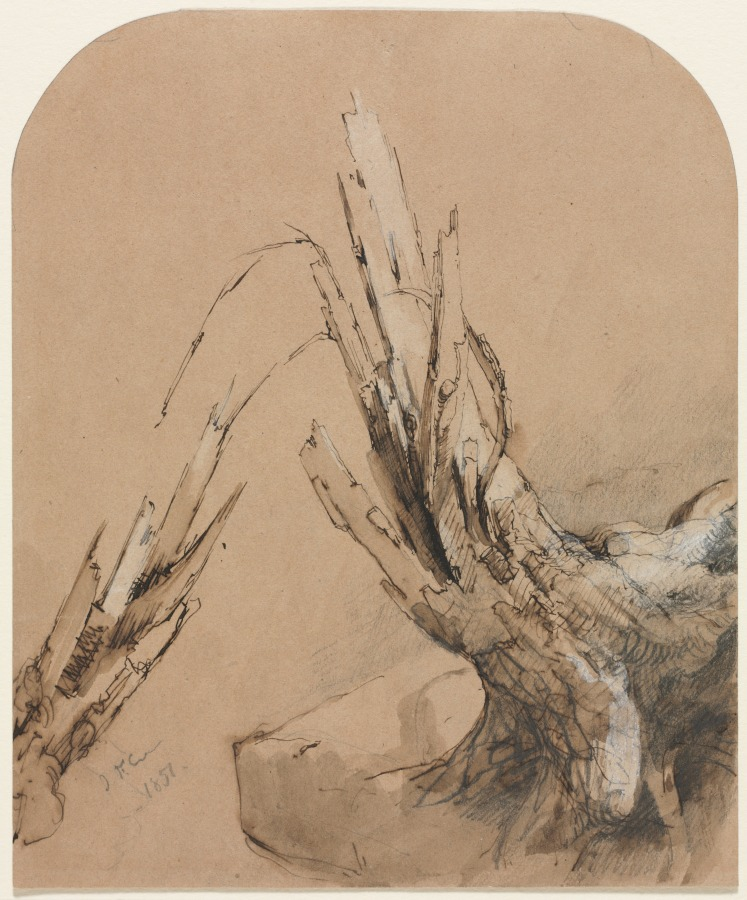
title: A Blasted Tree (recto) Floorplan (verso)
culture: America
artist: Jasper F. Cropsey (American, 1823–1900)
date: 1851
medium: pen and brown ink, brown wash and graphite, heightened with white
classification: Drawing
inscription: signed, lower left, in graphite: J. F. C. / 1851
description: This detailed drawing of a blasted tree was a study for Cropsey’s painting The Cove--A Storm Scene in the Catskill Mountains (1851).